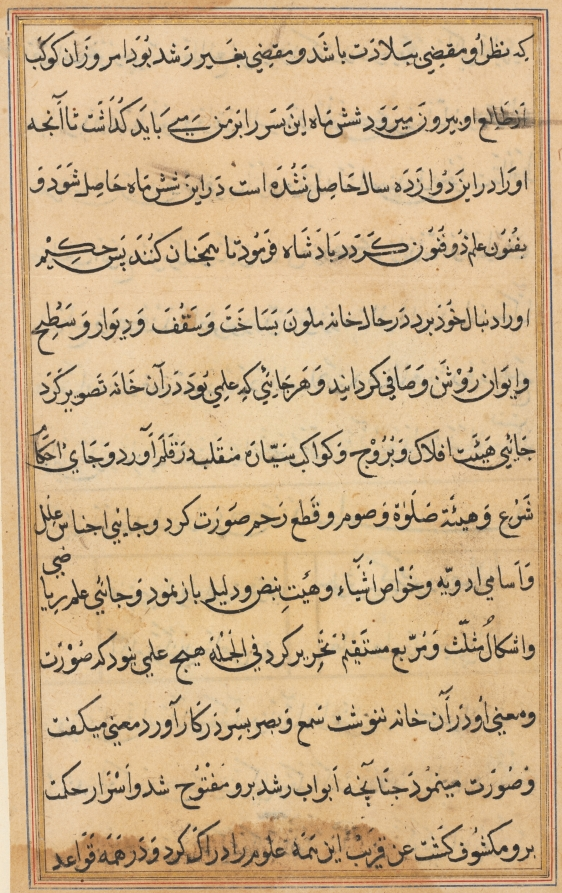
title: Page from Tales of a Parrot (Tuti-nama): text page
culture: Mughal India, court of Akbar (reigned 1556–1605)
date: c. 1560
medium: gum tempera, ink, and gold on paper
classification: Painting